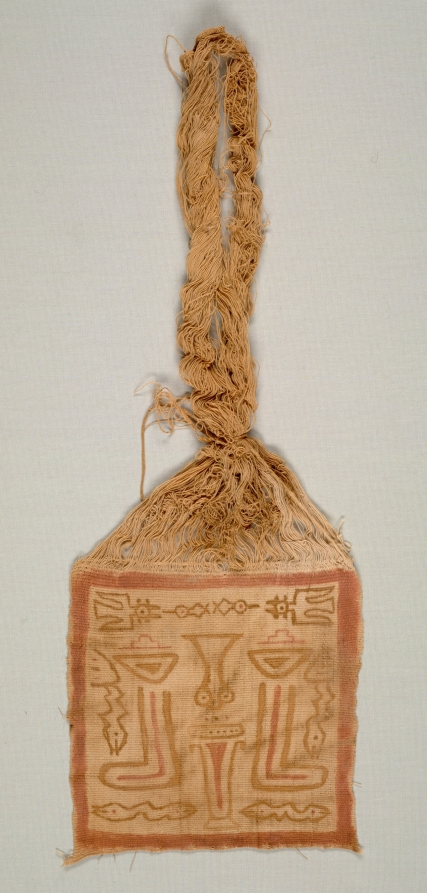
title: Mummy Bundle "Mask"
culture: Peru, South Coast, Ica Valley, Ocucaje site, Paracas style (700 BCE–1 CE)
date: 400–200 BCE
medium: cotton and pigment, plain weave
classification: Textile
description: The Paracas people buried their dead in bundles that they created by carefully wrapping the seated human body in layers of garments and other textiles. In some cases, they placed a painted cloth—such as these examples—on the outer layer and at the top of the bundle. The hair-like yarns (unwoven warps) were arranged around a solid cotton disk that was sometimes wrapped with a headband. The cloths, then, seem to have functioned as the bundle’s head, even though some are painted not with faces but with complete figures whose supernatural character is marked by the appendages streaming from their bodies.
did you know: These masks fall into two categories, those with only a face and those with a full-bodied figure.